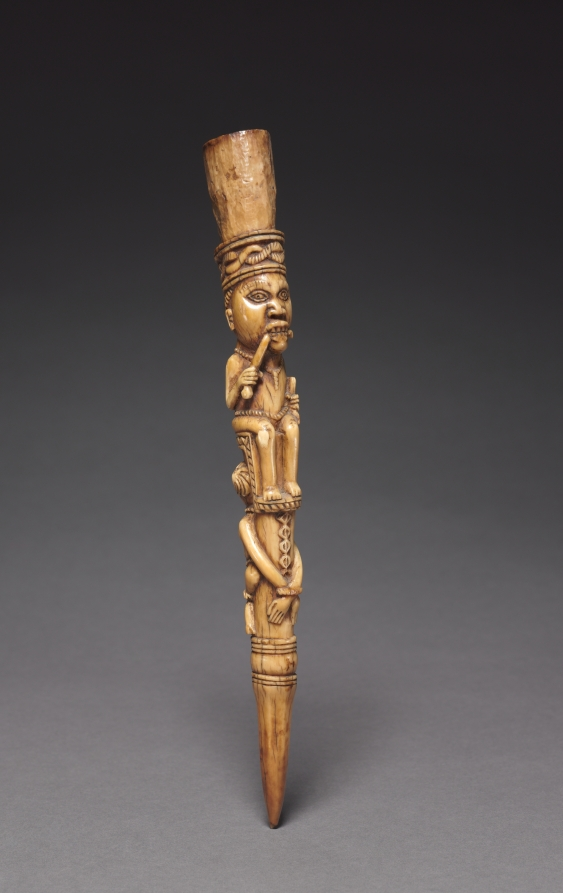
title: Scepter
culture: Africa, Central Africa, Democratic Republic of Congo (most likely), Cabinda, or Republic of Congo, probably Kongo-style (Yombe sub-group) carver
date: late 1800s–early 1900s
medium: ivory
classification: Implements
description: Used by male chiefs, ivory scepters were symbols of status indicating worldly authority and supernatural influence. The use of ivory implies that the chief has the fatal power of an elephant. The figurine shows a chief enthroned on the bound body of a criminal destined for such a death. A medicine package would have been enclosed within the container extending from the figure’s head, bestowing supernatural powers.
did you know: Scepters often represent the chief sitting atop a bound prisoner or attribute to a violent death.